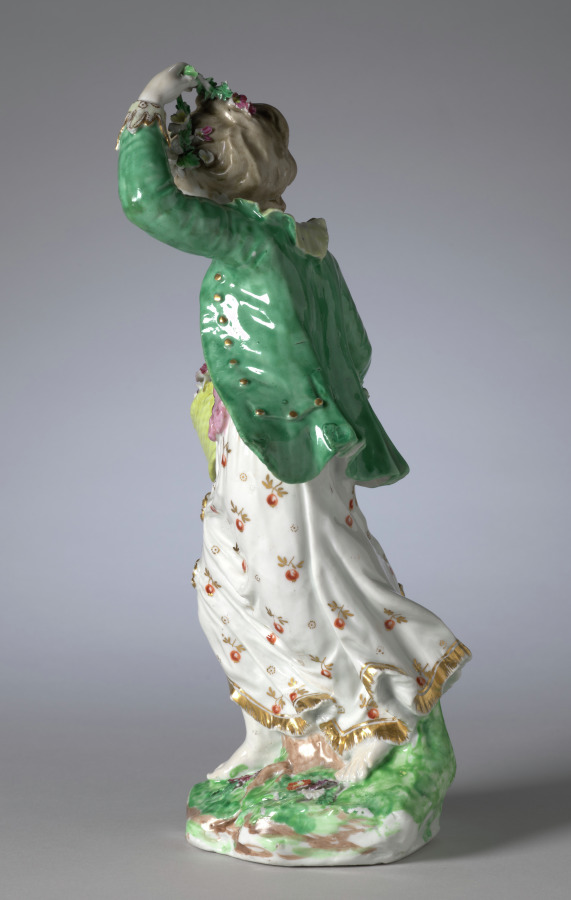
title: Figure of Spring from the Four Seasons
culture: England, Bristol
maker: Bristol Porcelain Factory (British, 1770–81)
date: c. 1775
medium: hard-paste porcelain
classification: Ceramic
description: The modern notion of childhood as a time of innocence and simplicity emerged during the second half of the eighteenth century. This understanding of adolescence led to numerous depictions of children as personifications of the four seasons. Here spring is portrayed as a young girl adorning her hair with flowers. The flowers filling her basket and growing in the grass around her signal spring’s arrival.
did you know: Allegorical figures most often decorated a table during the dessert course, providing amusing subjects for conversation.